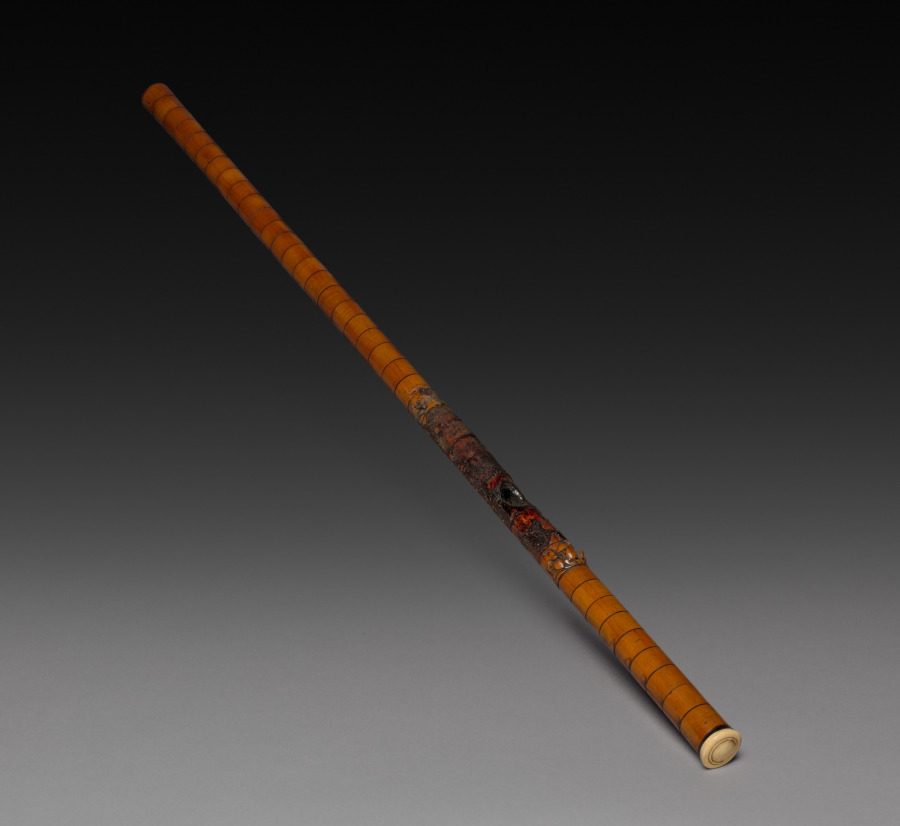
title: Opium Pipe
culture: China, Qing dynasty (1644-1911)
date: 1800s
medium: wood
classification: Miscellaneous